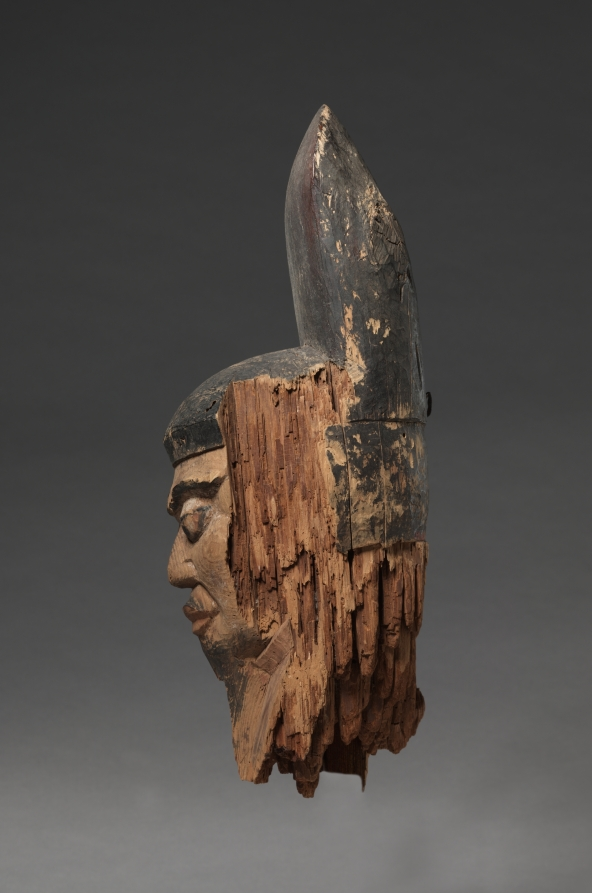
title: Head of a Male Shinto Deity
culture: Japan, Heian period (794–1185)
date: 900s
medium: wood with lacquer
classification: Sculpture